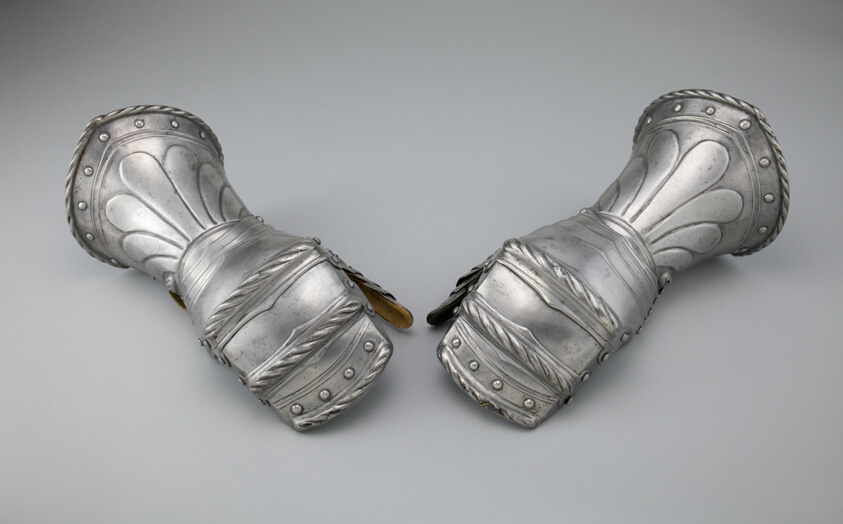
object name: Armor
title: Pair of Mitten Gauntlets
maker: German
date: 19th century (?) in the Innsbruck style of c. 1530/40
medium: Steel and leather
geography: Germany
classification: suit-gauntlet; armor; arms and armor